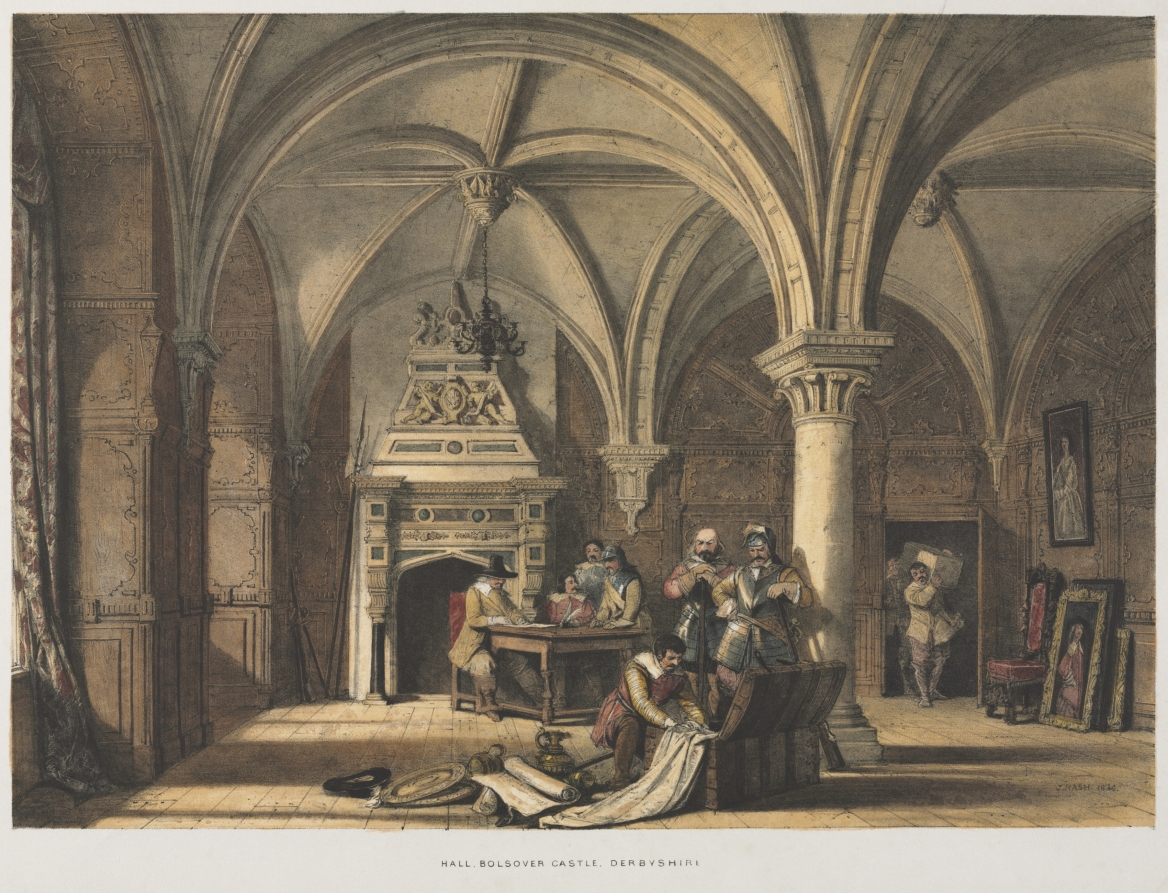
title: Hall, Bolsover Castle, Derbyshire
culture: England, 19th century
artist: Joseph Nash (British, 1808–1878)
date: 1840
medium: lithograph, hand colored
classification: Print